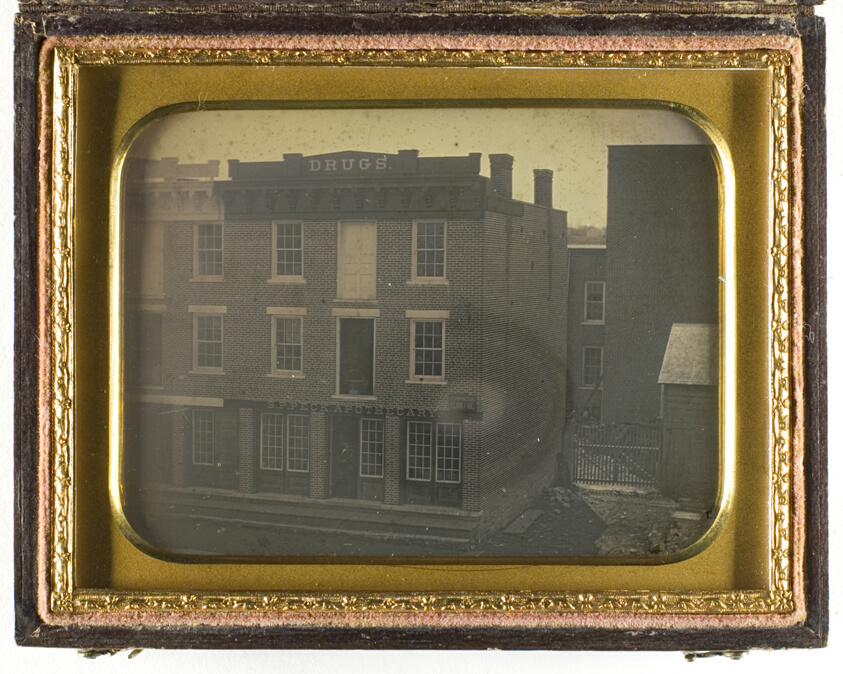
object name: Photograph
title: S. P. Peck Apothecary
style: 19th century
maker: Artist unknown; American, 19th century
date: 1839/60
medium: Daguerreotype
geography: United States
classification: daguerreotype; photographic process; photography; photograph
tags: Collected by Hugh Edwards